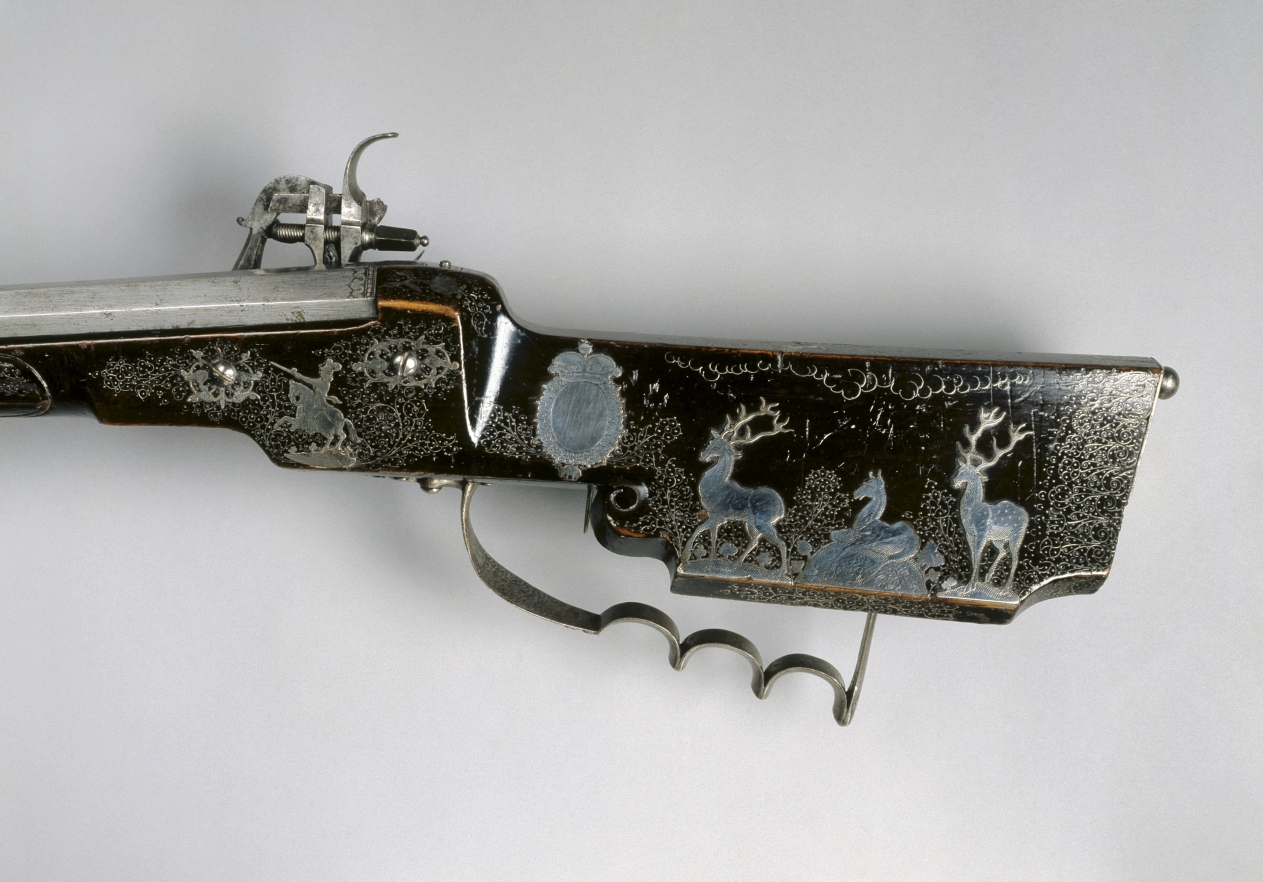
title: Wheel-Lock Hunting Rifle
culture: Austria, Ferlach, mid 17th Century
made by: Hans Schmidt (Austrian, 1669)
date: mid-1600s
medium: steel, varnished wood (walnut) stock decorated with inlaid silver wire and appliqués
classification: Arms and Armor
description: The barrel of this hunting piece is marked with the letters "GS" within a shield, the likely initials of the owner, who was probably a member of the Order of the Golden Fleece as indicated by the escutcheon on the stock.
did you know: A similar rifle made for another member of the Order of the Golden Fleece, Graf Sigmund von Dietrichstein, is preserved in Vienna.